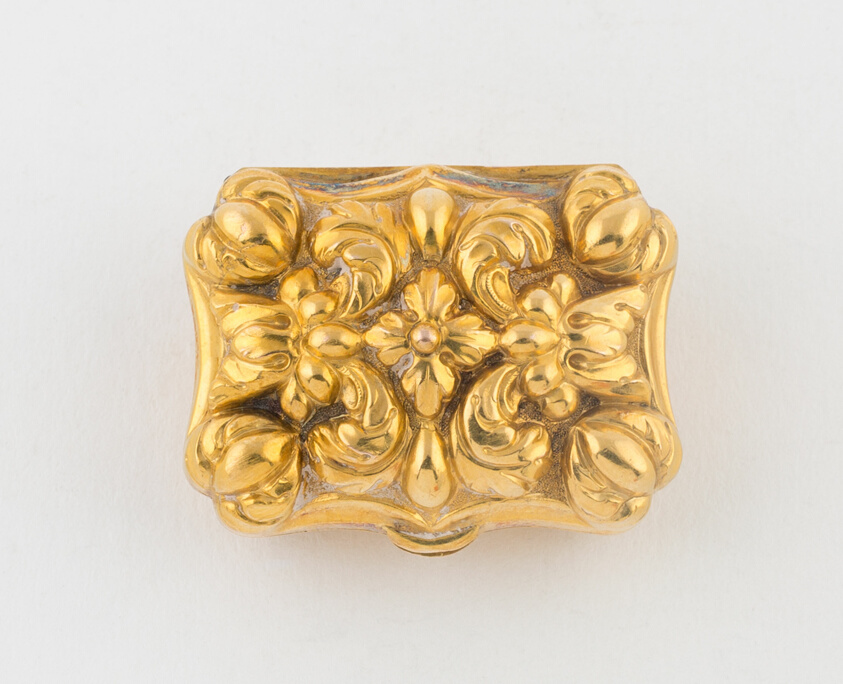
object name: Metalwork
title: Vinaigrette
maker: Possibly France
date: c. 1840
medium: Gold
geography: France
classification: vinaigrette (container for health care); container for personal use; box; european decorative arts; metalwork; decorative object/ornament